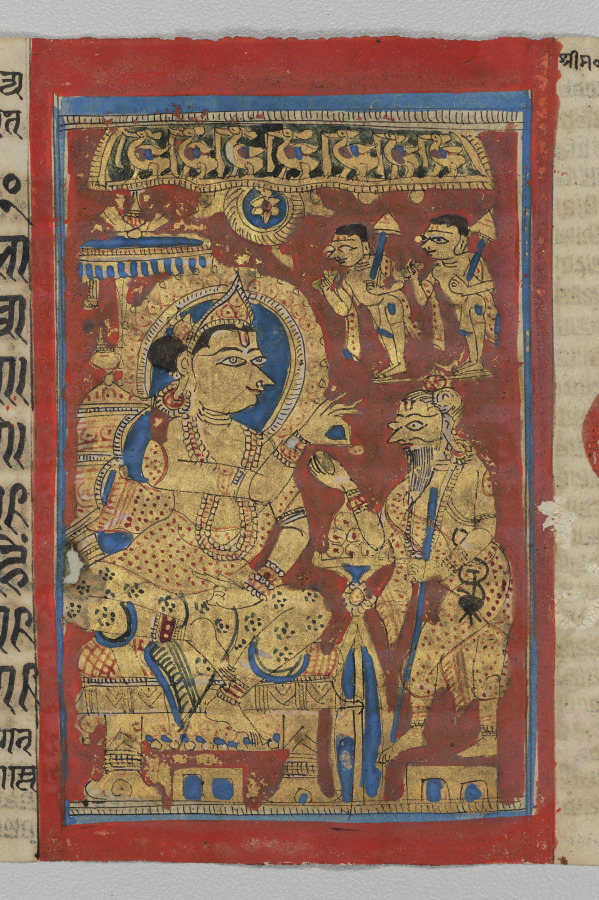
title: Mahavira Gives Away his Possessions, Folio 35 (verso), from a Kalpa-sutra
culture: Western India, Gujarat, last quarter of the 15th century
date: c. 1475–1500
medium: Gum tempera, ink, and gold on paper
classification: Painting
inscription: [[upper right]] Śrī Ma* saṃvaśsarī dān